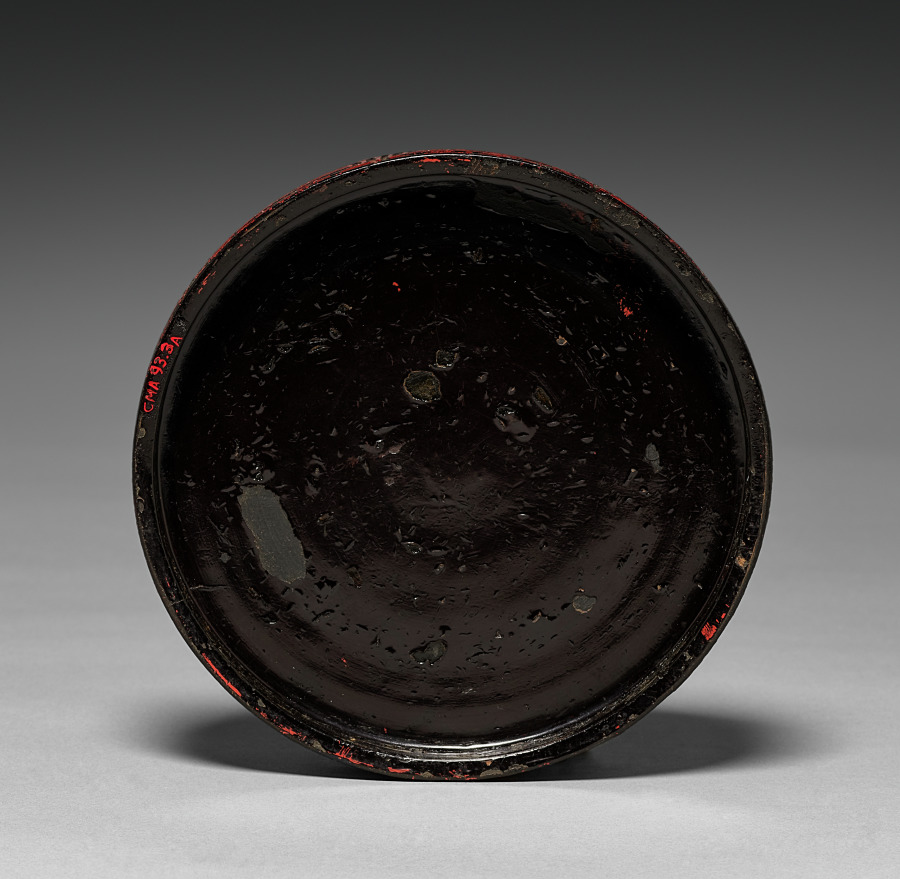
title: Incense Box (Kogo) with Camellia Design (lid)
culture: Japan, Muromachi period (1392–1573)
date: 1500s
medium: carved wood with black and red lacquer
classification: Lacquer